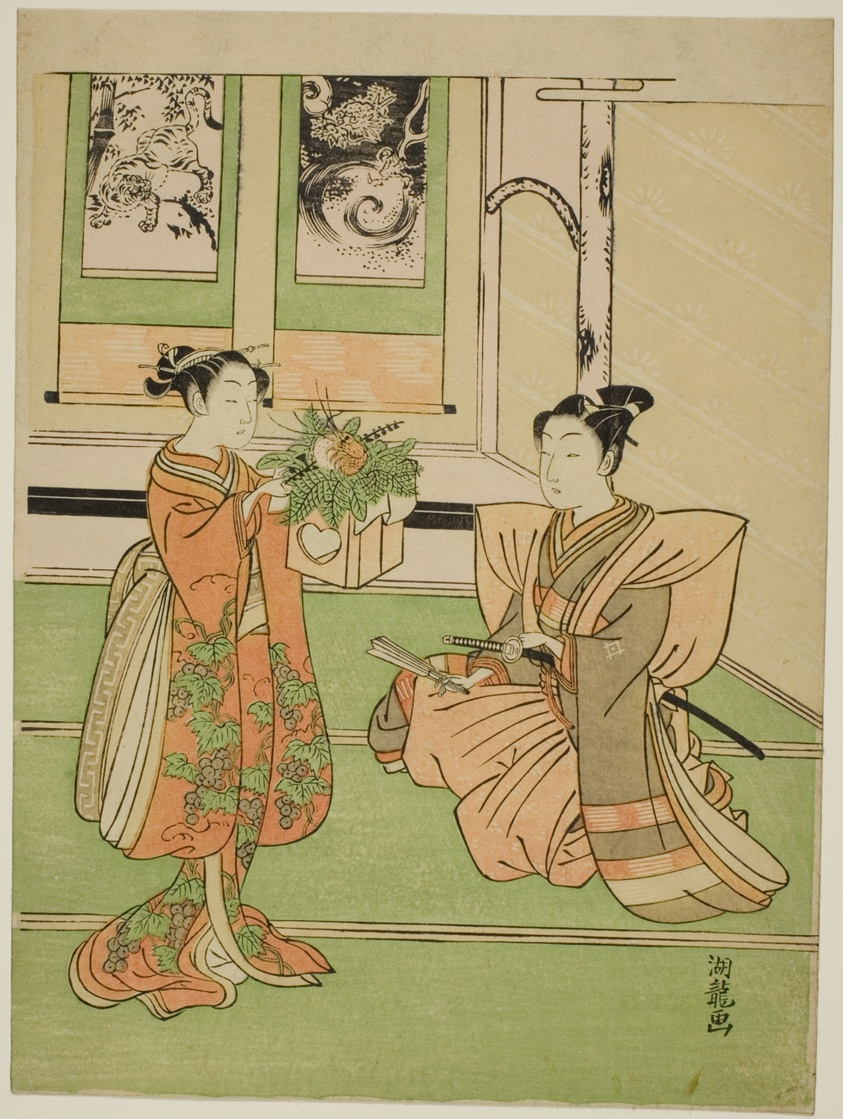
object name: Print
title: The New Year's Offering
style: Japanese (culture or style)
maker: Isoda Koryusai (Japanese, 1735-1790)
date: c. 1769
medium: Color woodblock print; chuban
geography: Japan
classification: woodblock print; print; asian art